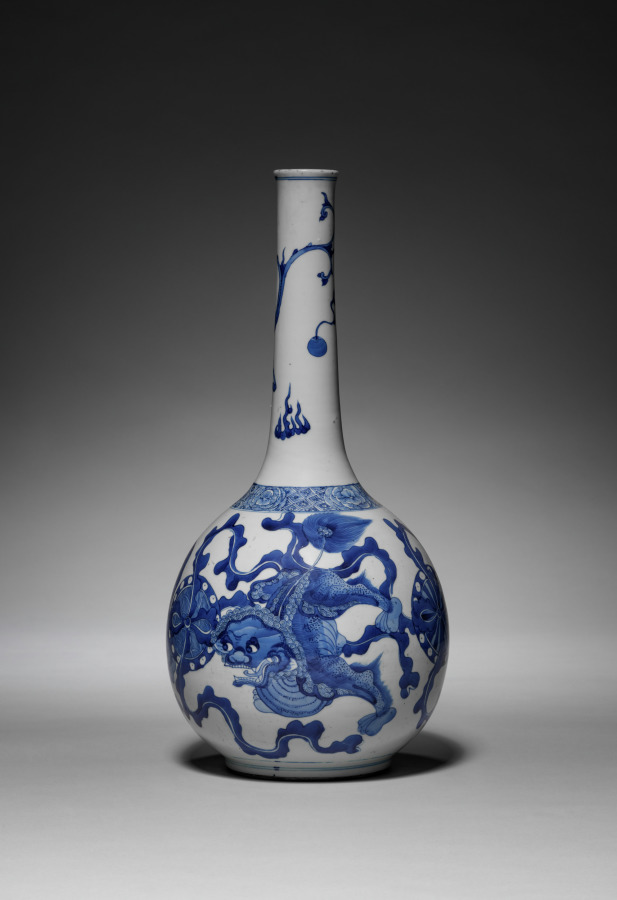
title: Bottle Vase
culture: China, Qing dynasty (1644-1911), Kangxi reign (1661-1722)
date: 1662–1722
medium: porcelain with underglaze blue decoration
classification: Ceramic